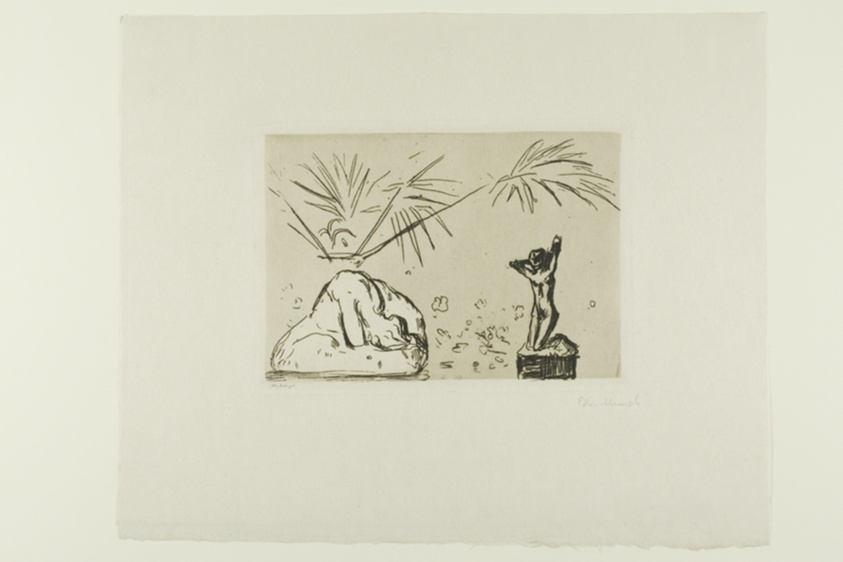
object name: Print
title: Interior with Sculptures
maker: Edvard Munch (Norwegian, 1863-1944)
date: 1902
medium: Etching and aquatint on cream wove paper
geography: Norway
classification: etching; print; prints and drawing